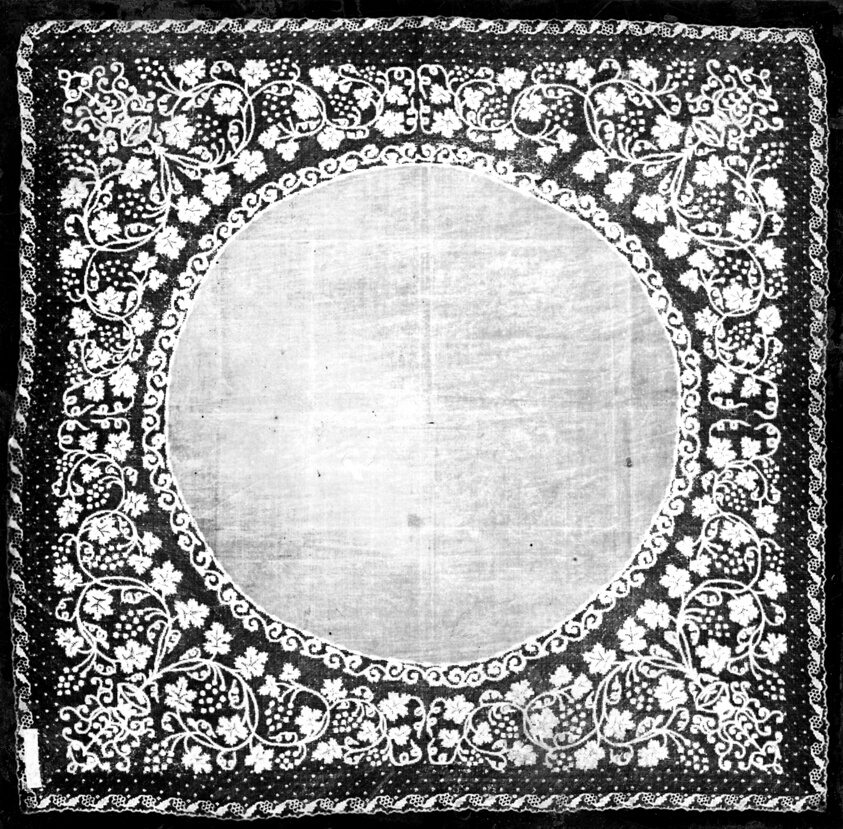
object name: Textile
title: Handkerchief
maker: Philippines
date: 19th century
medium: Linen, plain weave; embroidered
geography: Philippines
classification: textile; needlework (visual works)